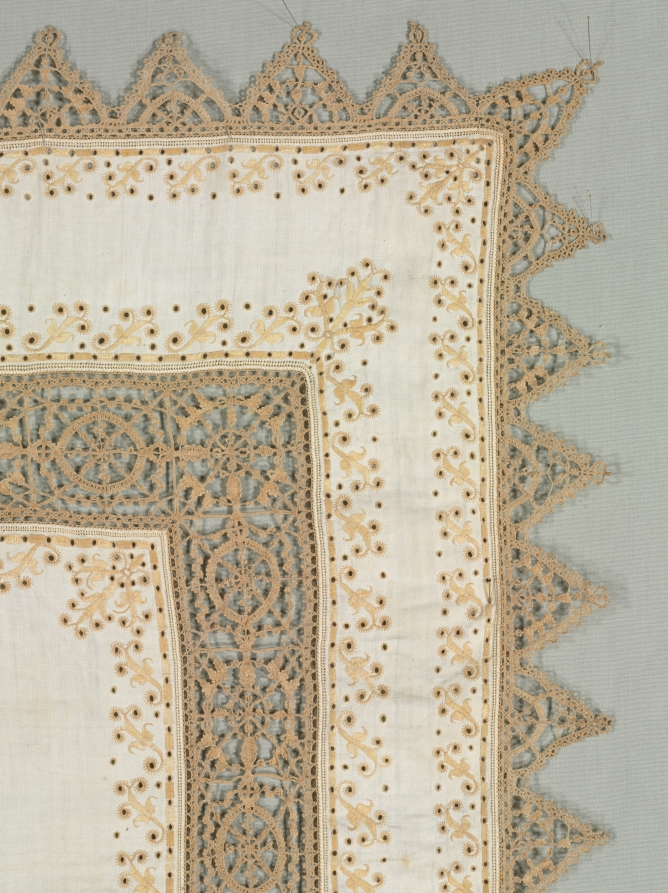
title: Cloth for a table ?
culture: Italy, Sicily, 1550-1599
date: 1550–1599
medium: Linen: bobbin lace (needle lace design)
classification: Lace